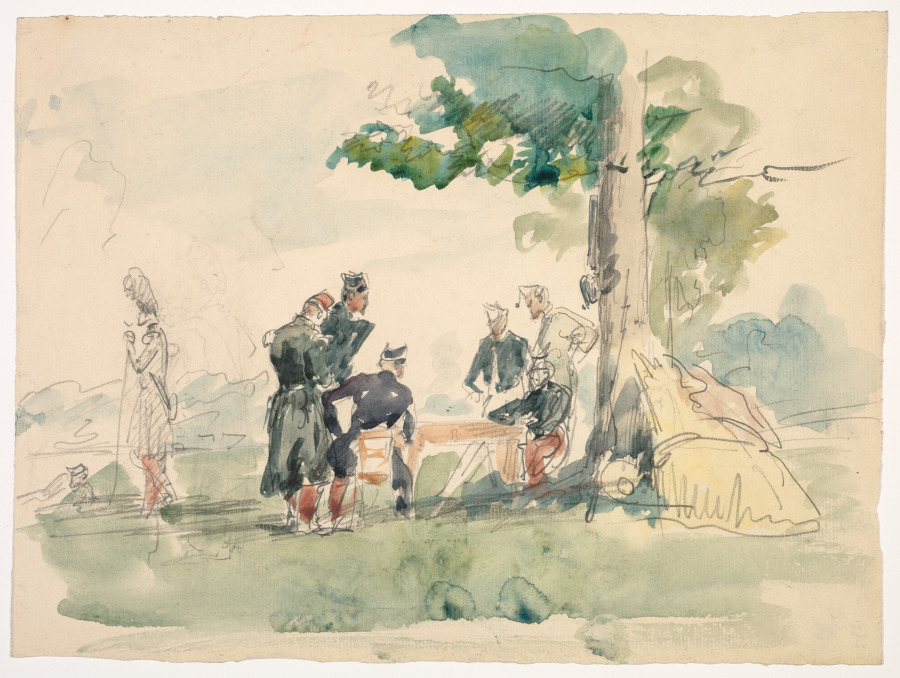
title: Militaires sous un arbre (Soldiers under a Tree)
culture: France, 19th century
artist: Isidore Pils (French, 1813/15–1875)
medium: Watercolor and graphite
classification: Drawing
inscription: lower left: Atelier Pils stamp